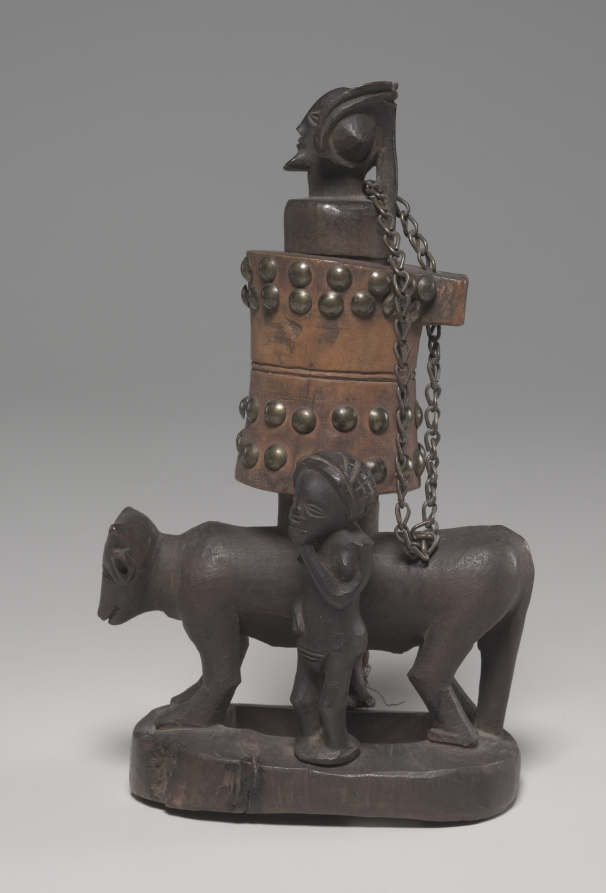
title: Snuff Mortar (Tesa Ya Ma Kanya)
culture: Africa, Central Africa, Angola or Democratic Republic of Congo, Chokwe carver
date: late 1800s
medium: Wood, upholstery studs, cloth, and metal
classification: Tool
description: Tobacco, introduced into Africa in the 16th century, became the prerogative of leaders. As patrons of the arts, Chokwe chiefs commissioned elaborate pipes and mortars as part of their court regalia for display during public gatherings.